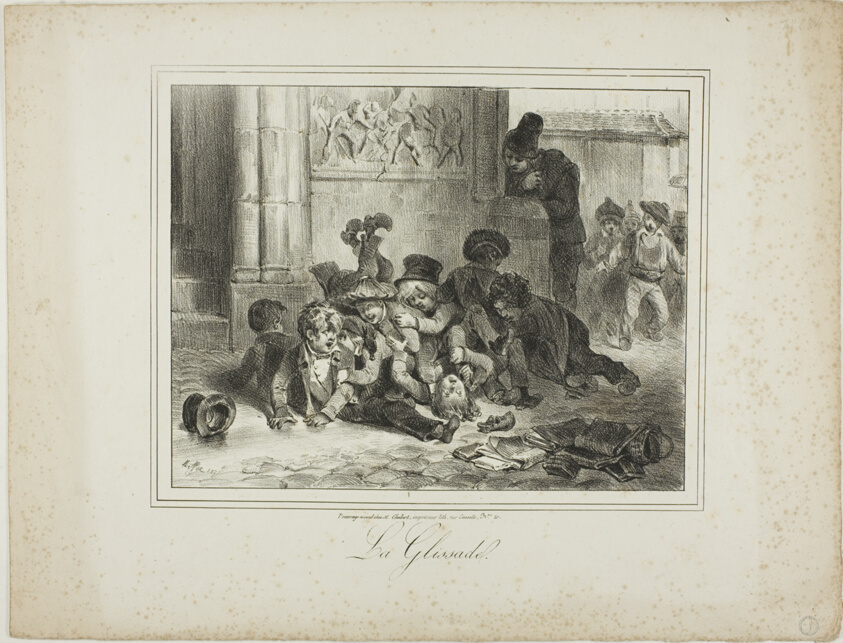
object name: Print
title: The Slide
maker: Denis Auguste Marie Raffet (French, 1804-1860); marketed by Chez M. Chabert (French, 19th century)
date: 1827–28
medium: Lithograph in black on ivory wove paper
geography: France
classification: lithograph; print; prints and drawing